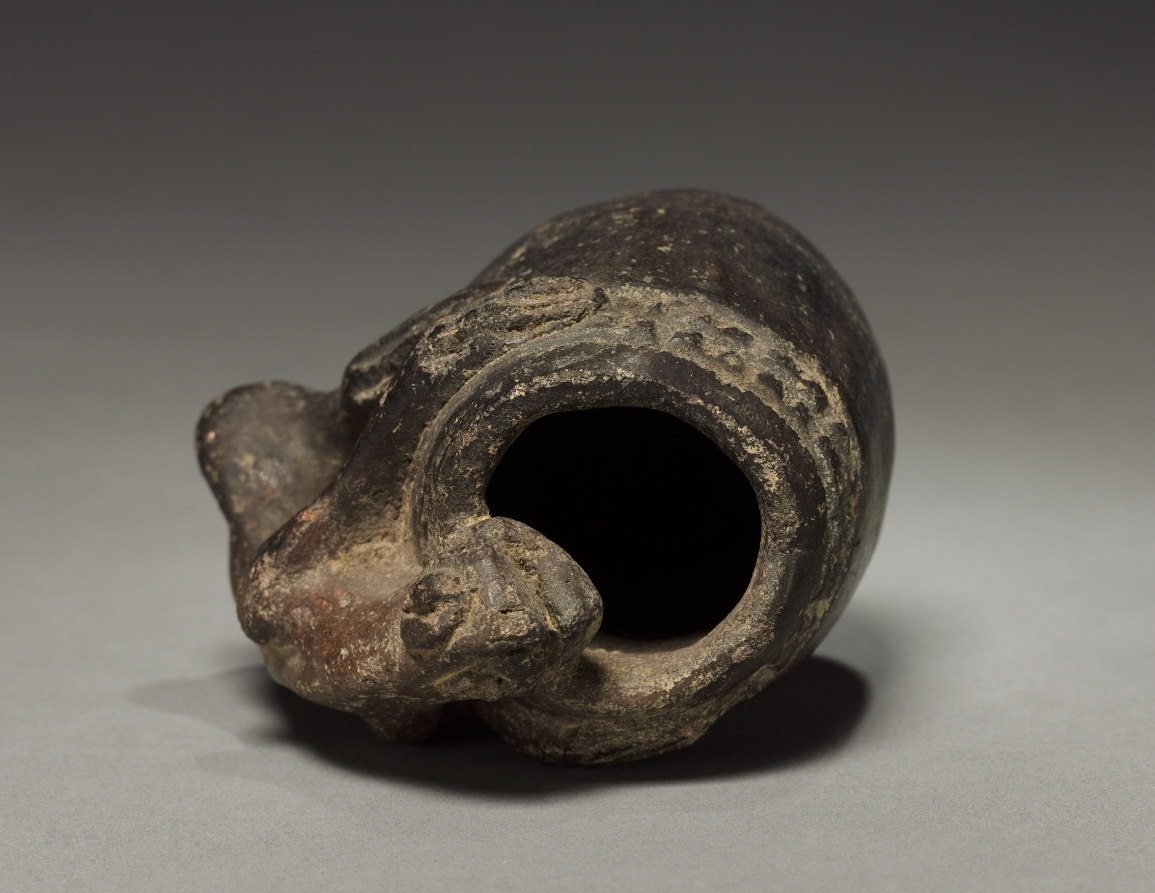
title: Jar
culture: Colombia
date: before 1921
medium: pottery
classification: Ceramic